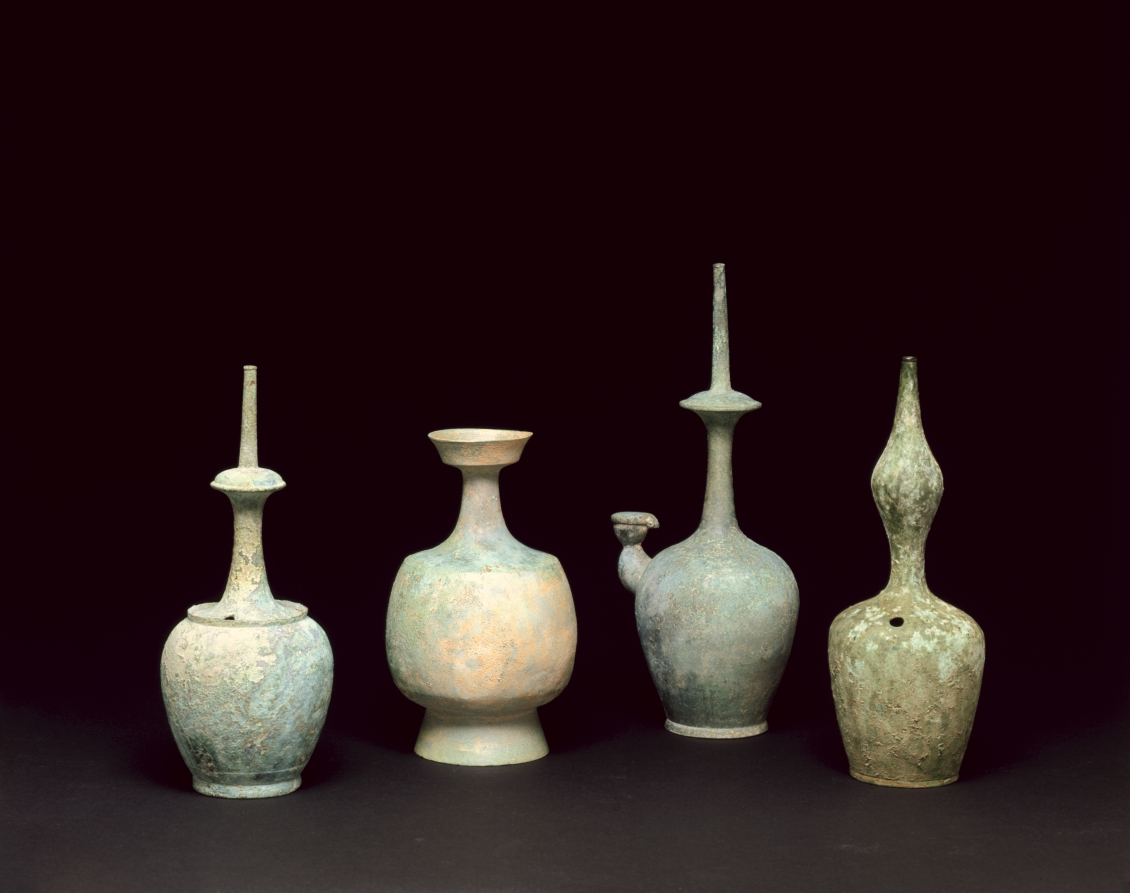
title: Water Ewer for Rituals (Kundika)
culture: Korea, Goryeo dynasty (918–1392)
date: 1100s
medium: bronze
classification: Metalwork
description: Known as kundika in Sanskrit, this distinctively shaped vessel served to purify a sacred space and to invoke a deity. In Korean Buddhist art, it appears primarily as an attribute of the Bodhisattva Avalokitesvara (Gwaneum in Korean). By the 12th century, however, it came to serve as aristocrats’ fancy water container for everyday use.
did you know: This distinctively shaped vessel is called a kundika in Sanskrit, simply referring to a water bottle.